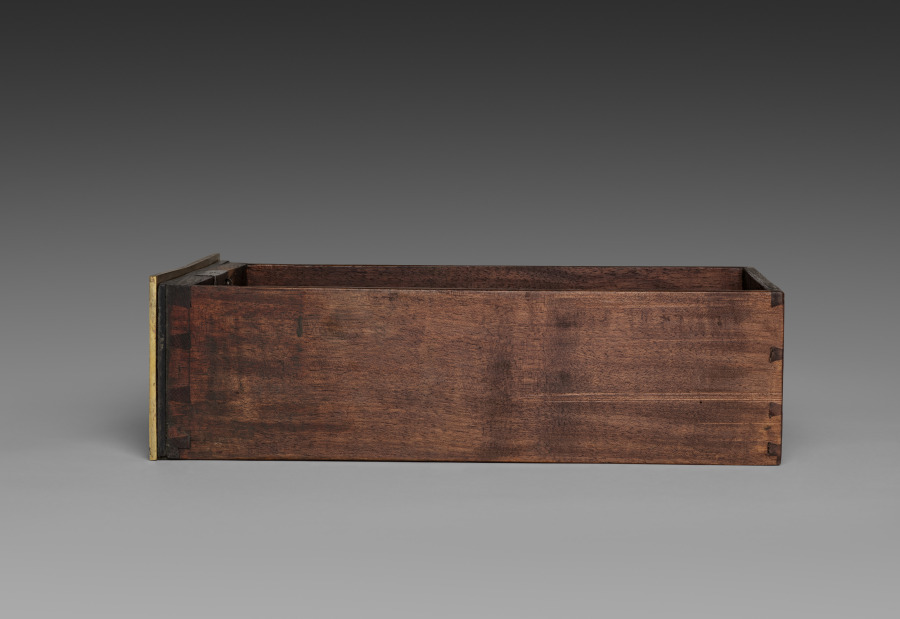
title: Side Drawer for Cabinet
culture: France, late 17th Century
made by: André-Charles Boulle (French, 1642–1732)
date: c. 1690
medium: ebony, marquetry in metal and tortoise shell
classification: Furniture and woodwork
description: Appointed cabinetmaker to King Louis XIV in 1672, André-Charles Boulle became a master of furniture making in France during the late 1600s until his death in 1732. Known primarily for his use of marquetry, in which metal patterns are inlaid into tortoiseshell then applied within the veneered surface of the furniture, Boulle established a level of quality and craftsmanship few others could achieve. As a result, his work found favor at the royal court and among other aristocrats and diplomats eager to impress the king. The inclusion of a medallion depicting Louis XIV within the bronze decoration of this chest would have identified the owner with the royal court. Often exhibiting stout architectural proportions with elegant groups of inlaid motifs such as the parrot on the central panel of this chest, Boulle’s designs are an example of the intellectual fashion for contrasting ideas, materials, and motifs.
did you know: Originally designed to sit atop an elaborate tall stand, this chest was likely altered in the late 1700s to reduce its scale and height.